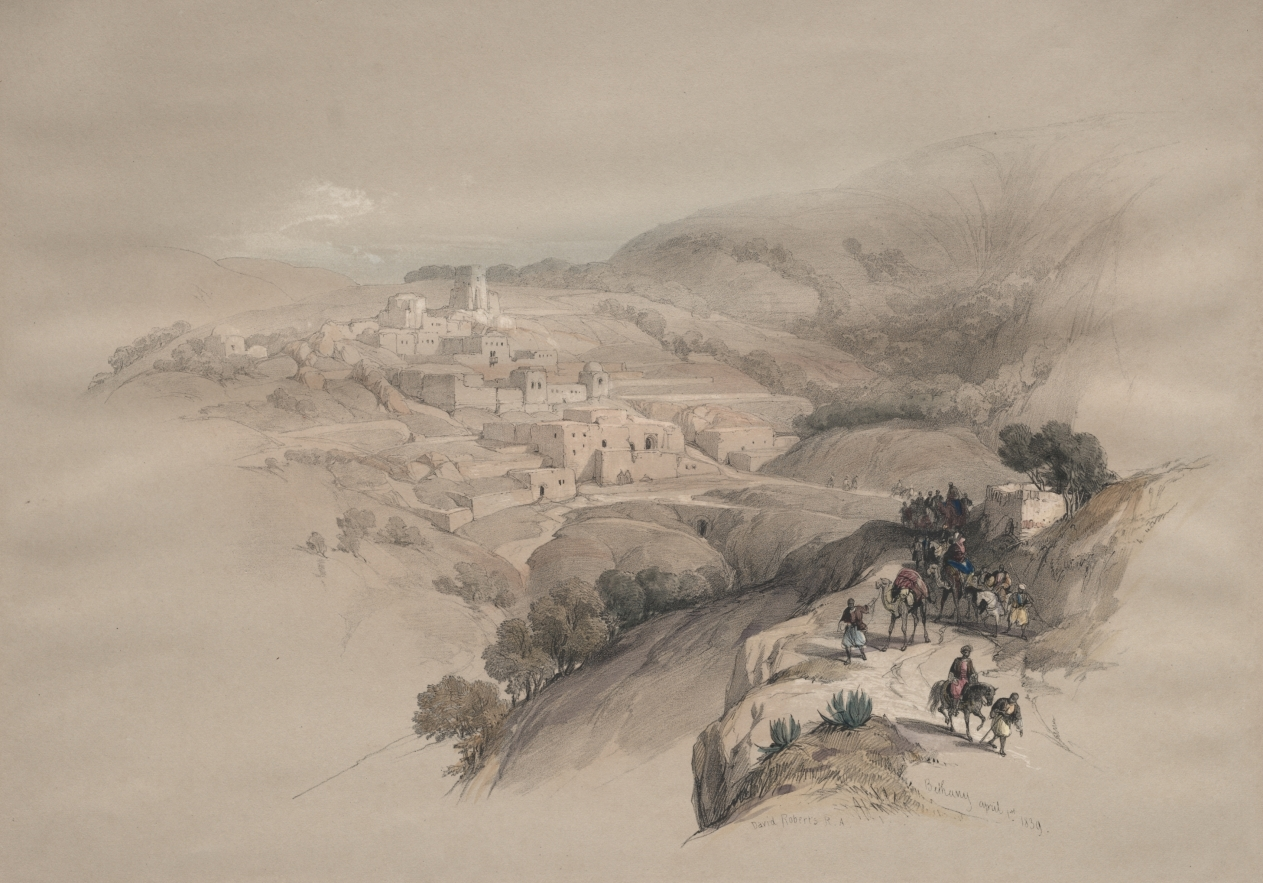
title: Bethany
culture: England, 19th century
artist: David Roberts (Scottish, 1796–1864)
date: 1839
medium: color lithograph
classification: Print